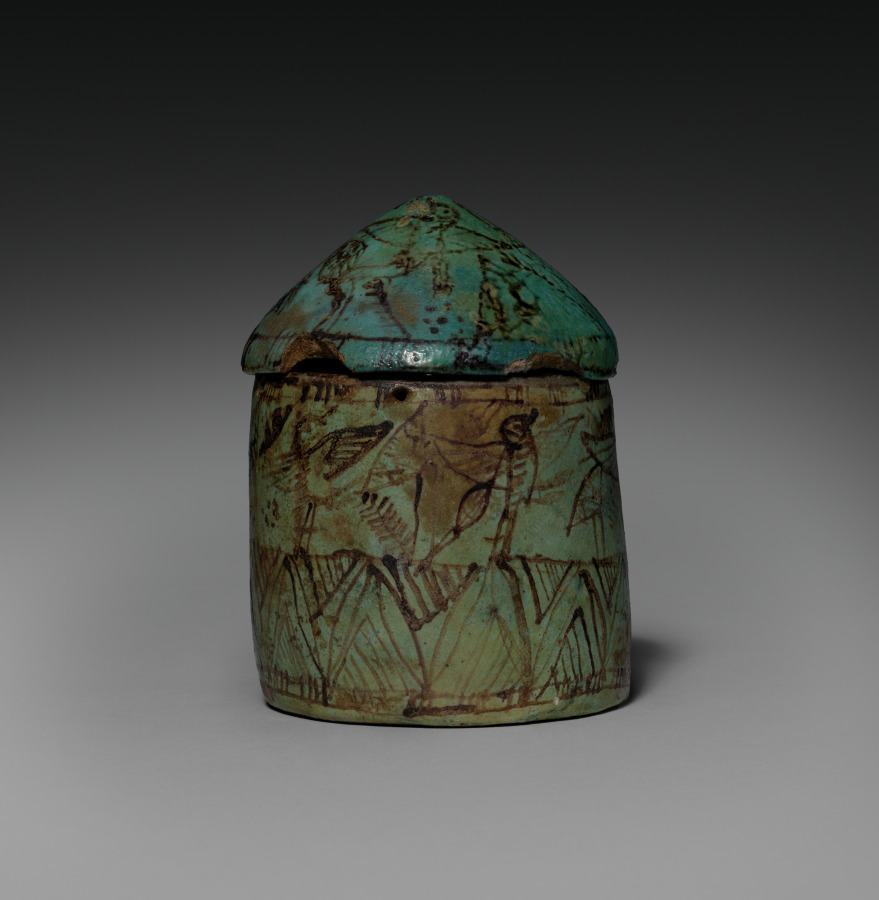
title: Pyxis with Lid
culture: Egypt, Middle Kingdom (2040–1648 BCE)–New Kingdom (1540–1069 BCE)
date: c. 1901–1525 BCE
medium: turquoise faience with black decoration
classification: Vessels